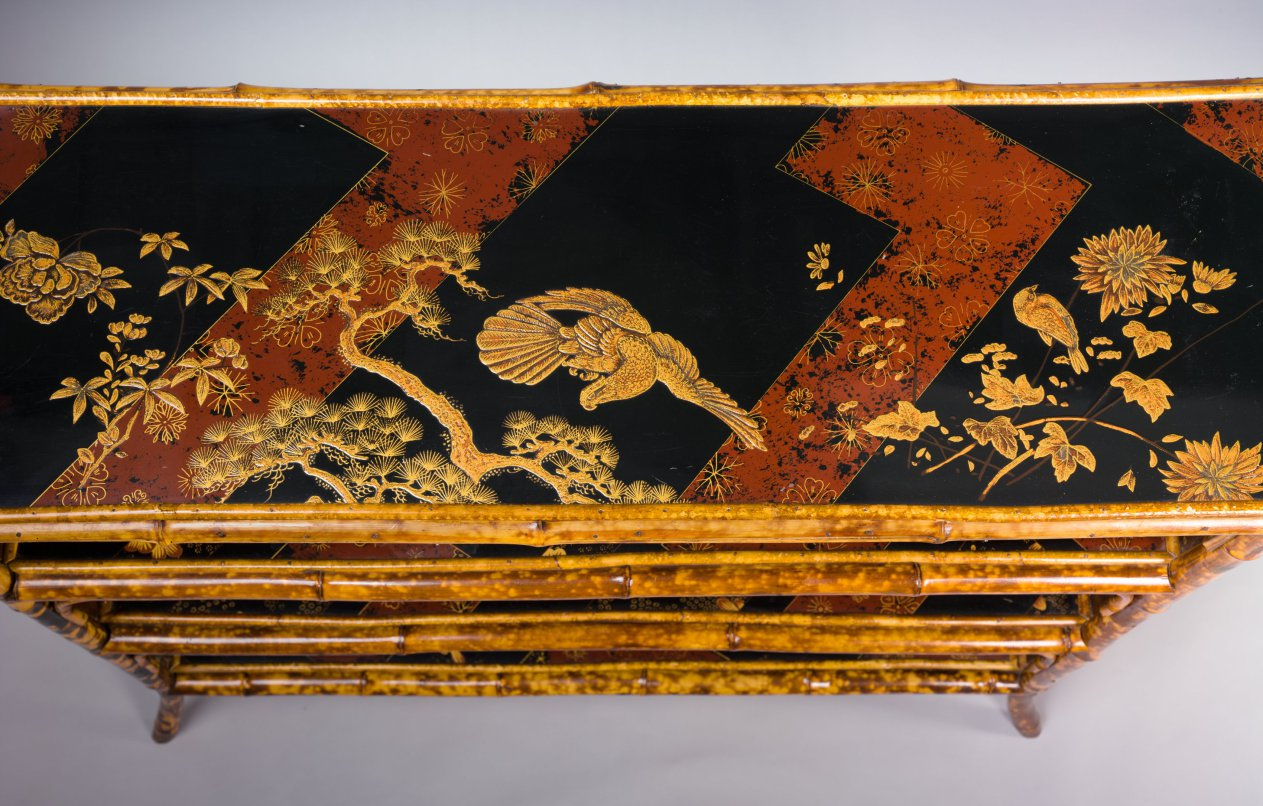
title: Bookcase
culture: France, 19th century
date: c. 1870–80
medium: bamboo with Japanese lacquer panels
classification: Wood